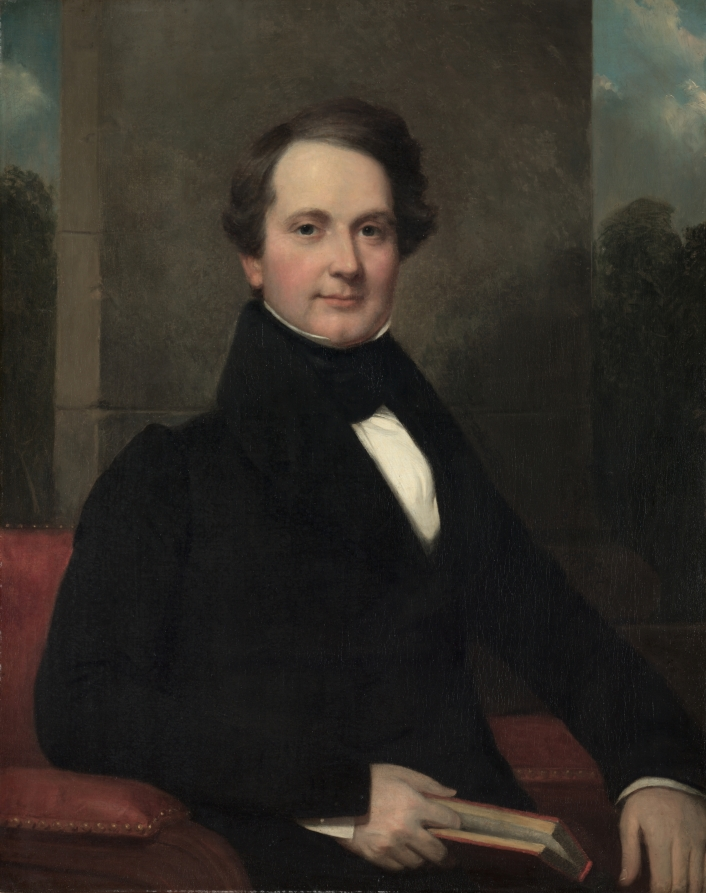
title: Frederic Betts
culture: America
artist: Henry Inman (American, 1801–1846)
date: 1830s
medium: oil on canvas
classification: Painting